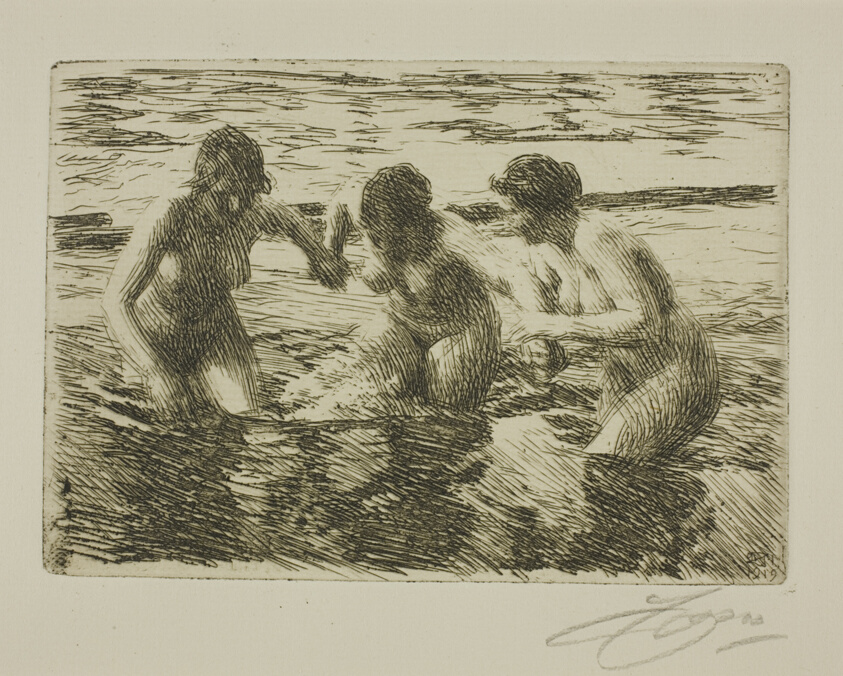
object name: Print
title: Against the Current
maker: Anders Zorn (Swedish, 1860-1920)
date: 1919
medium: Etching on ivory laid paper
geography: Sweden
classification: etching; print; prints and drawing